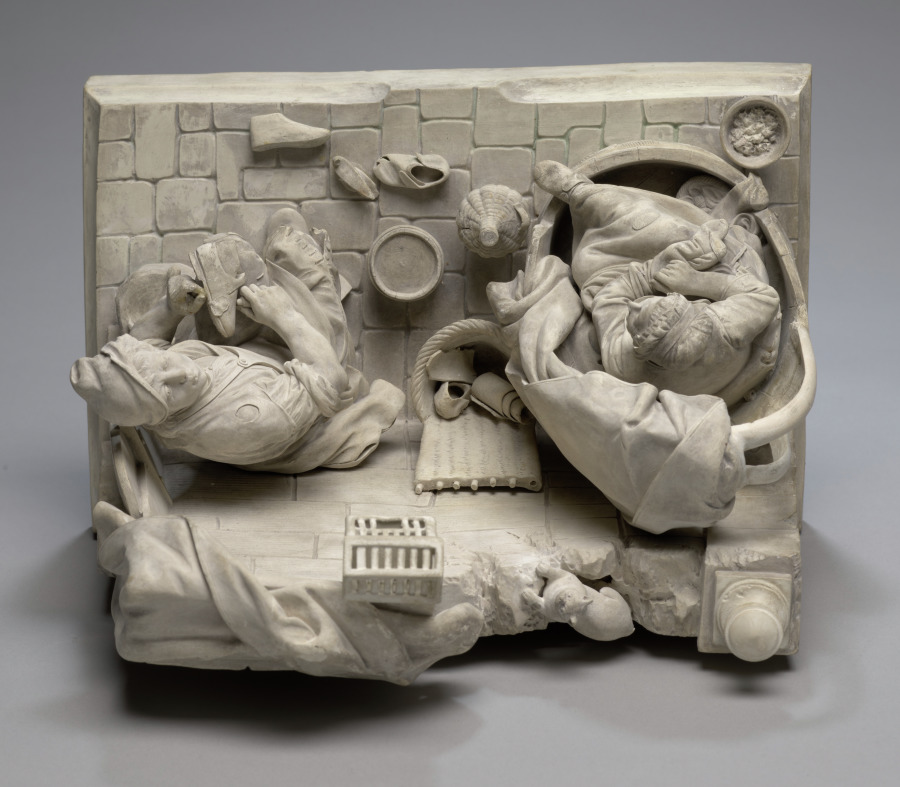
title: The Cobbler and His Bird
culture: France, Bellevue near Toul, late 18th century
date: late 1700s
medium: earthenware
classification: Ceramic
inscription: incised inscription on back of base: "Bellevue van de Toul."